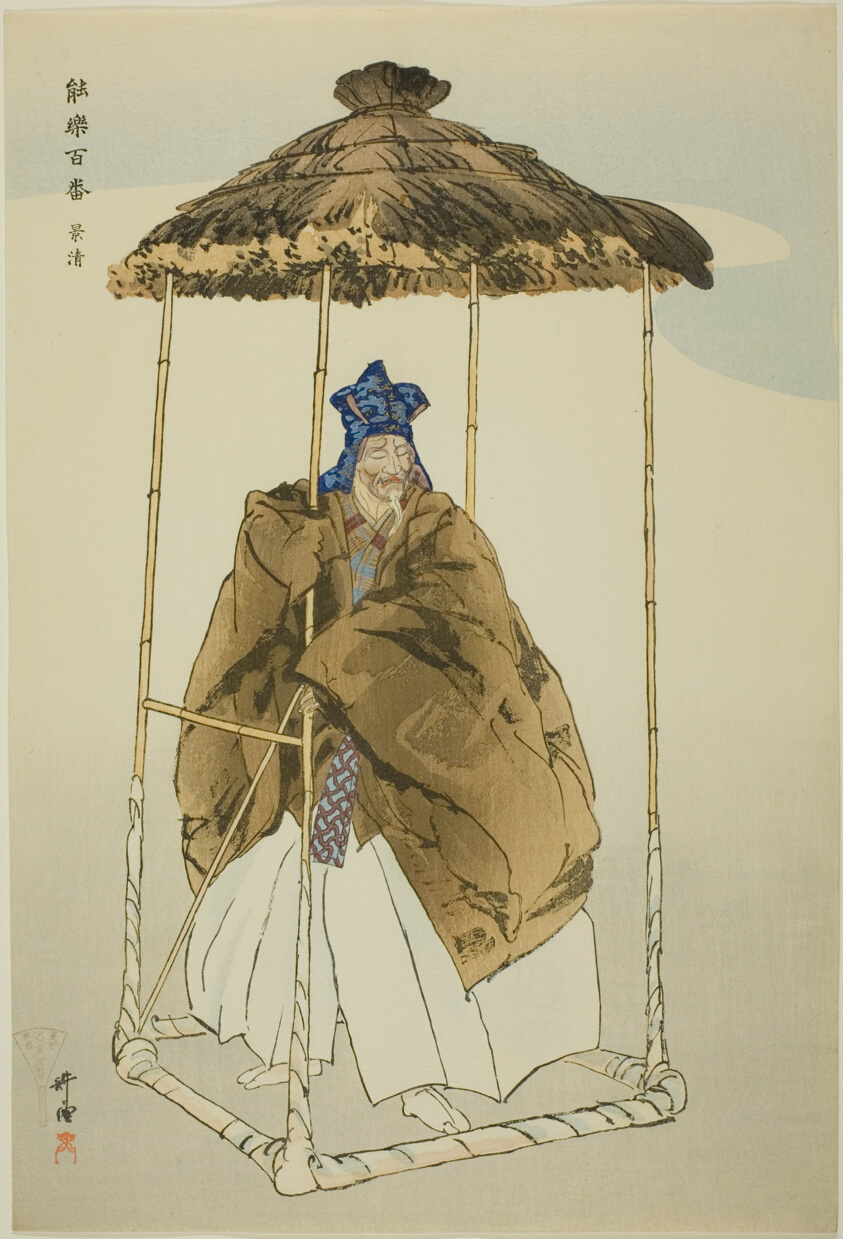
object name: Print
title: Kagekiyo, from the series "One Hundred No Dramas (Nogaku hyakuban)"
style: Japanese (culture or style)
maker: Tsukioka Kogyo; Japanese, 1869-1927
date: 1898/1903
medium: Color woodblock print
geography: Japan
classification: woodblock print; print; asian art